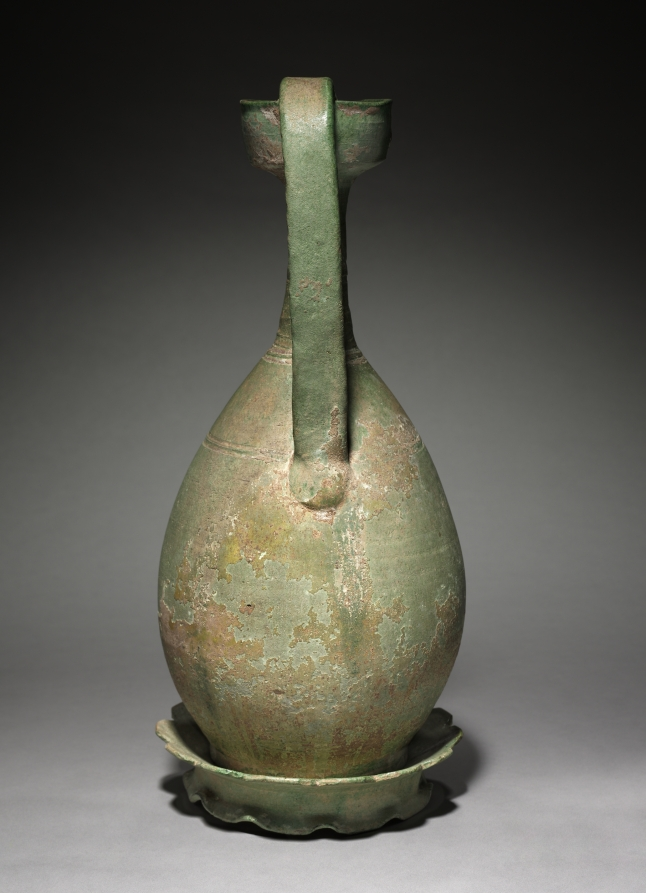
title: Ewer with Corolla Base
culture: China, Manchuria, Liao dynasty (916-1125)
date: 907–1125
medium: pottery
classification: Ceramic